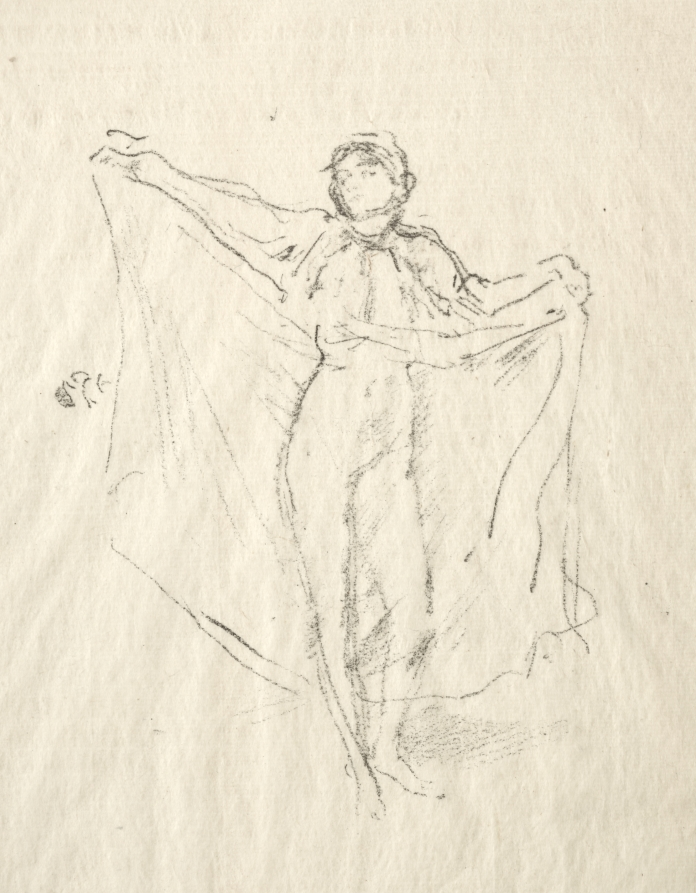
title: La Danseuse - A Study of the Nude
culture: America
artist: James McNeill Whistler (American, 1834–1903)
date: c. 1891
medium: lithograph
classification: Print